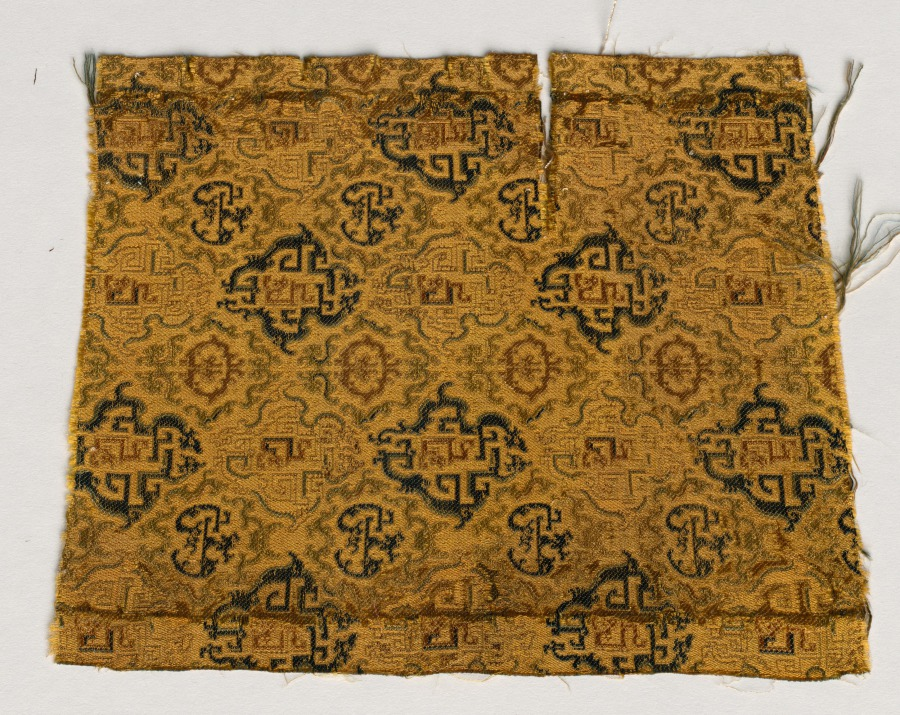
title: Fragment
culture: China, Qing dynasty (1644-1911)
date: 1800–1820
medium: Silk, diaper weave; twill ground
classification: Textile